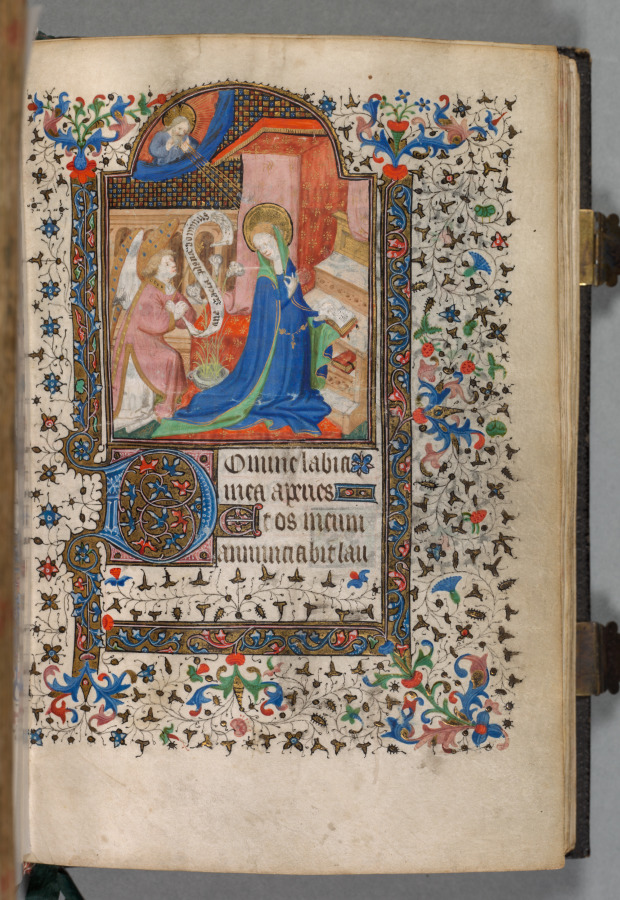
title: Book of Hours (Use of Paris): Fol. 37r, Annunciation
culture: France, Paris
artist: possibly studio or workshop of The Bedford Master (French, Paris, active c. 1405–30)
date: c. 1420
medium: ink, tempera, and gold on vellum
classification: Bound Volume